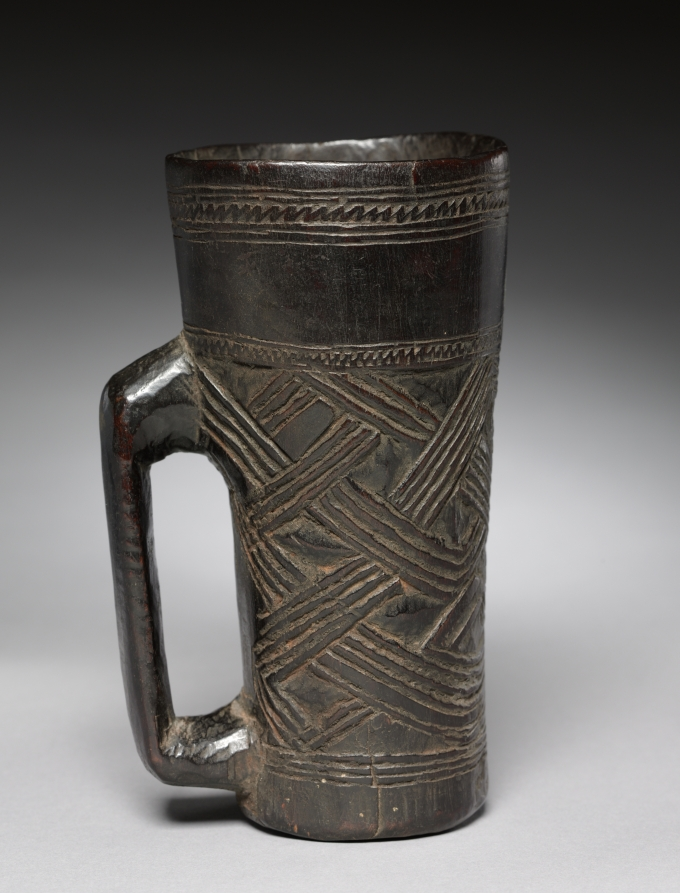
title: Cup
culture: Central Africa, Democratic Republic of the Congo, Bushoongo, 20th century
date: 1900s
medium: Wood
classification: Vessels